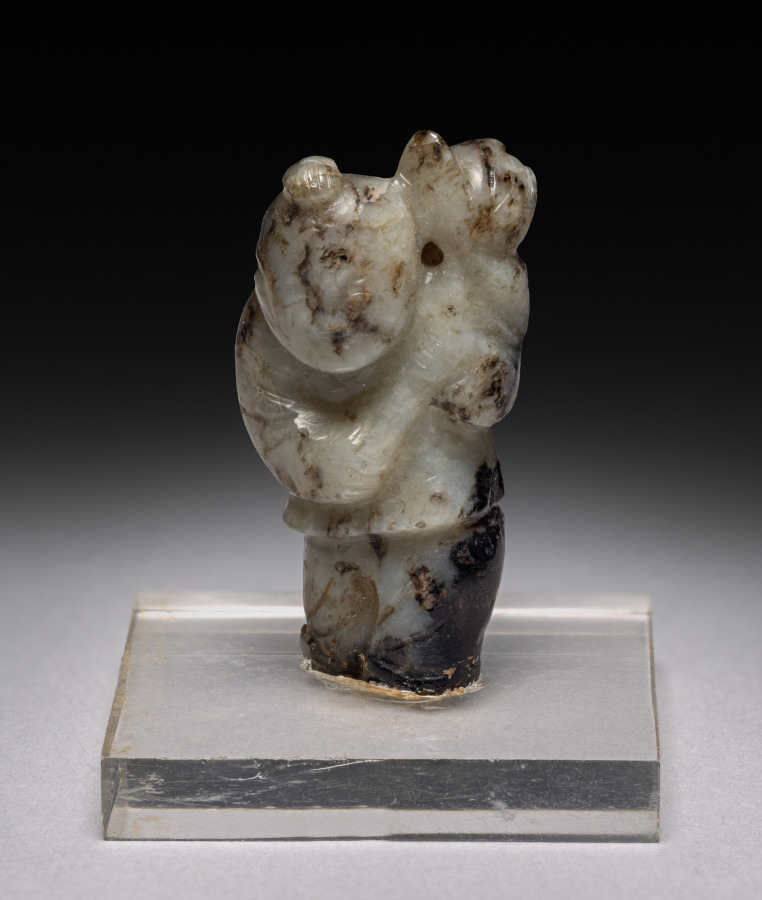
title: Boy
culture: China, Tang dynasty (618-907) - Song dynasty (960-1279)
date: 8th-10th Century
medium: jade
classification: Jade